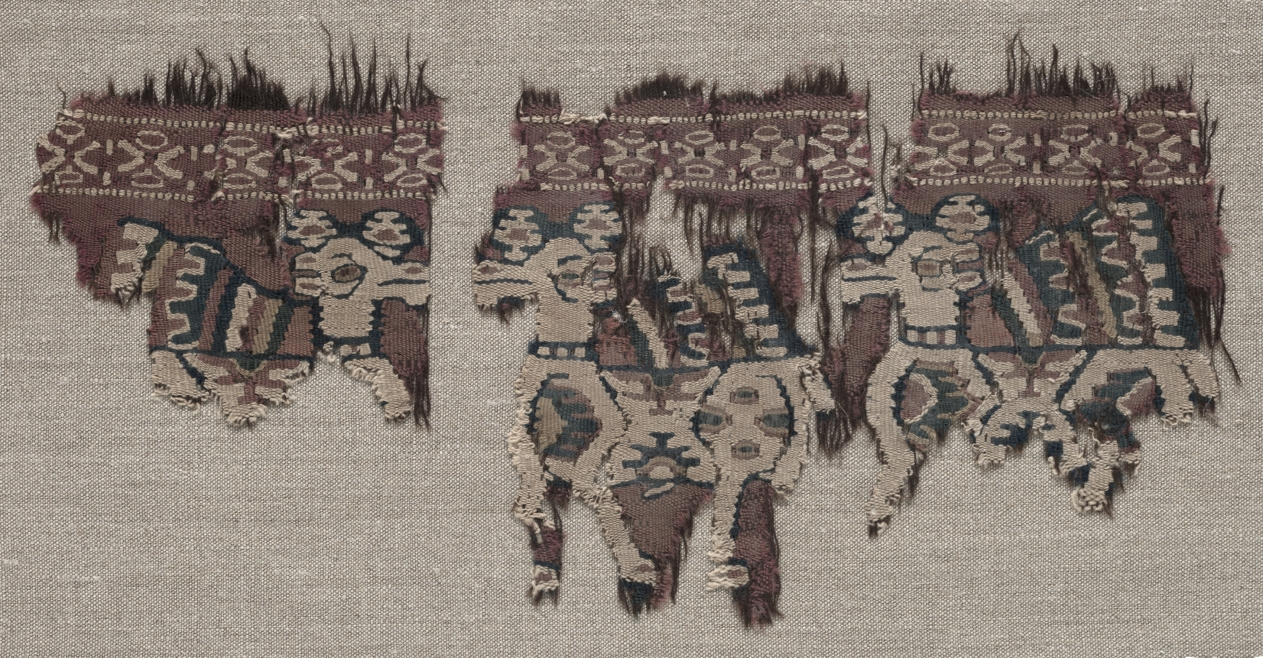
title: Two Mounted Fragments of a Border (from a Garment ?)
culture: Iran or Iraq, Abbasid period (750–1258)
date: late 700s–early 800s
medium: goat hair, wool, and cotton: tapestry (originally inwoven in tabby ground)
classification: Textile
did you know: The design consists of a frieze of very stylized rams.